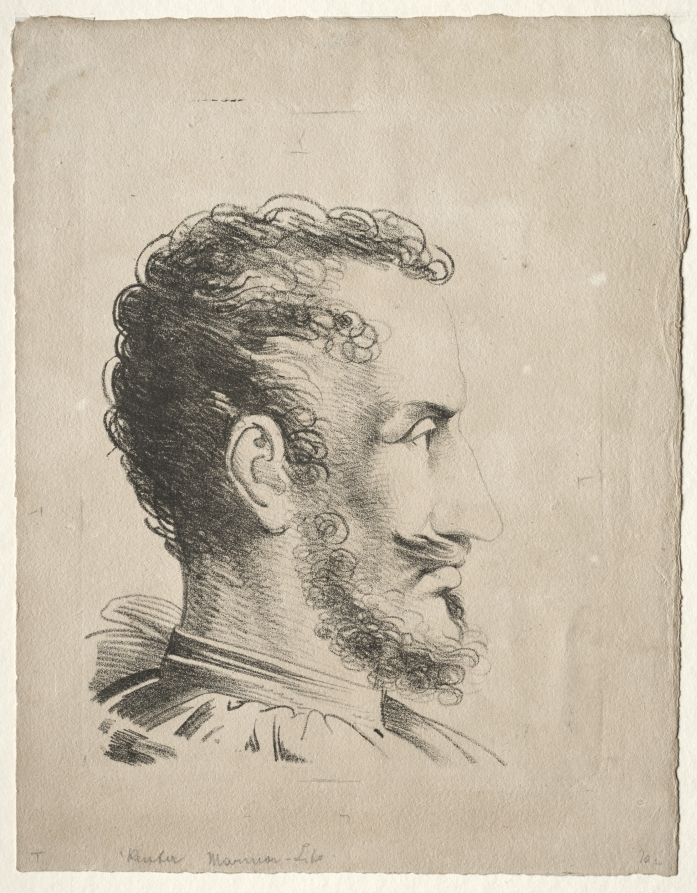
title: Profile Head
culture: Germany, 18th-19th century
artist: Friedrich Wilhelm Reuter (German, 1768–1834)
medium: lithograph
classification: Print